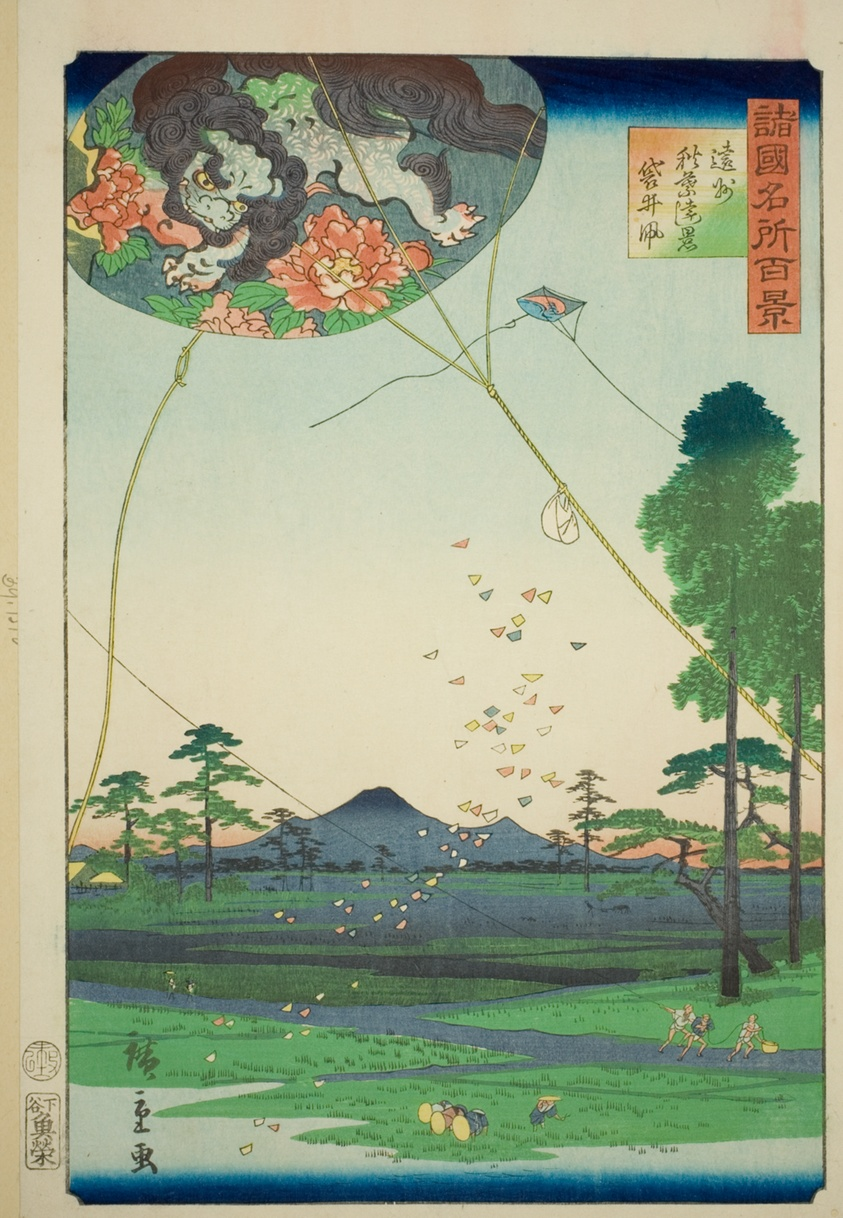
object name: Print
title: Kites of Fukuroi and Distant View of Akiba in Totomi Province (Enshu Akiba enkei Fukuroi tako), from the series "One Hundred Famous Views in the Various Provinces (Shokoku meisho hyakkei)"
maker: Utagawa Hiroshige II (Shigenobu) (Japanese, 1826–1869)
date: 1859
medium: Color woodblock print; oban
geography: Japan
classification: woodblock print; print; asian art